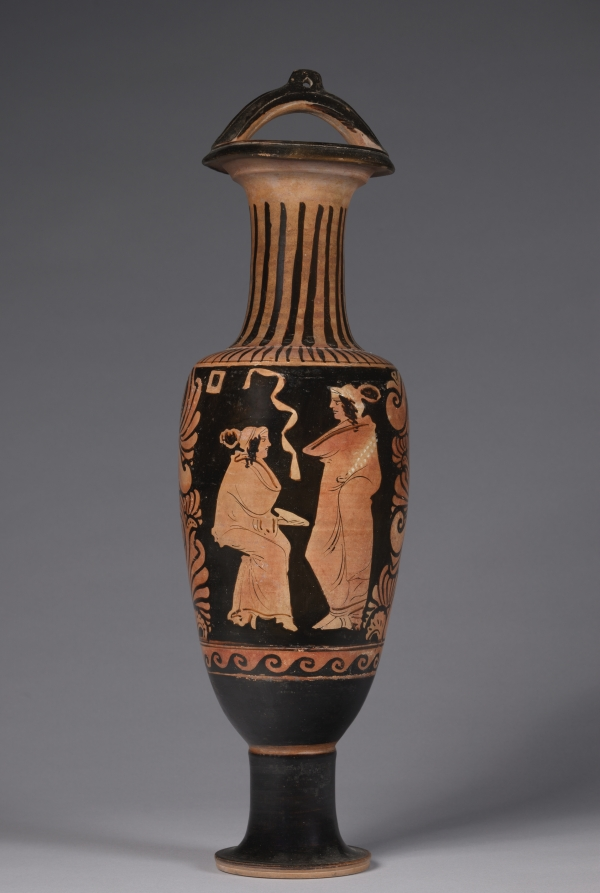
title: Red-Figure Bail Amphora (Storage Vessel): Draped Women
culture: South Italian, Campanian, Cumaean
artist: attributed to CA Painter, Walters Sub-group (South Italian, Campanian, active at Cumae, c. 350–320 BCE)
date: 330–320 BCE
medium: ceramic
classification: Ceramic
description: The bail amphora, named for the tall handle arching over the mouth, is a shape made primarily in Campania, where red-figure vases were produced at both Capua and Cumae in the 4th century BC. The anonymous painter of this vase is known as the CA Painter, for Cumae A, the first significant artist in this area. The seated and standing women on both sides of the vase, some only partially draped (and their white skin now largely lost), recall those on many of the painter’s other vases, as do the elaborate palmette patterns on either side.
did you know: This vase once belonged to the famous opera singer Evan Gorga.